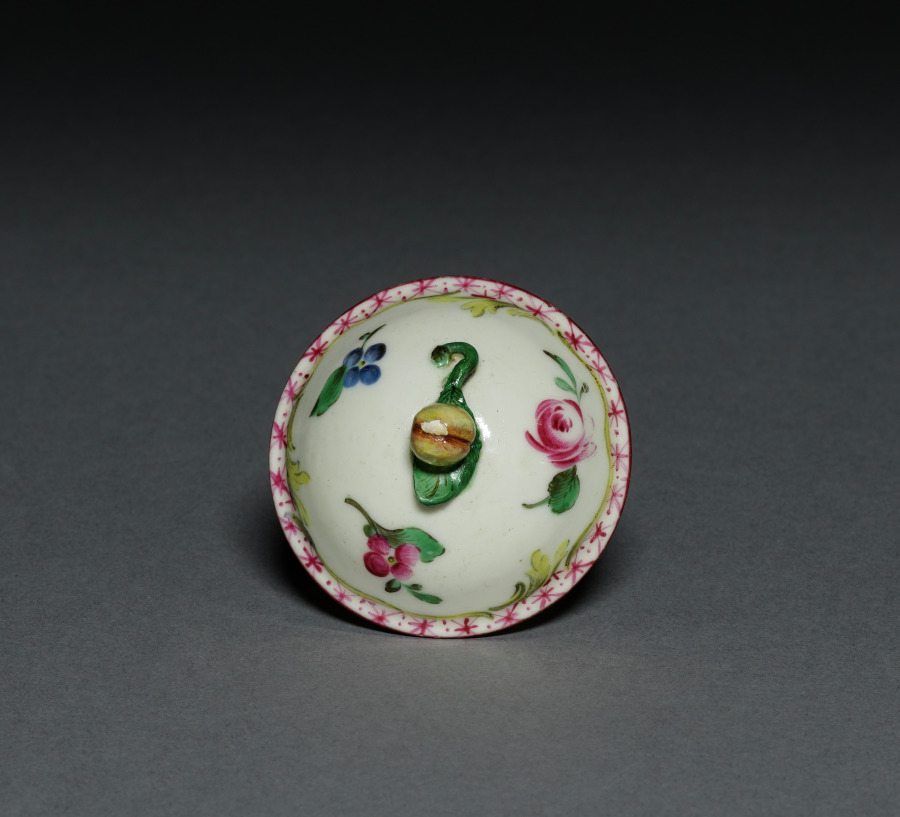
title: Cover for a Custard Cup (pot à jus)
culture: France, Mennecy, 18th century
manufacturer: Mennecy- Villeroy Factory (French)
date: c. 1750–55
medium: soft-paste porcelain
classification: Ceramic